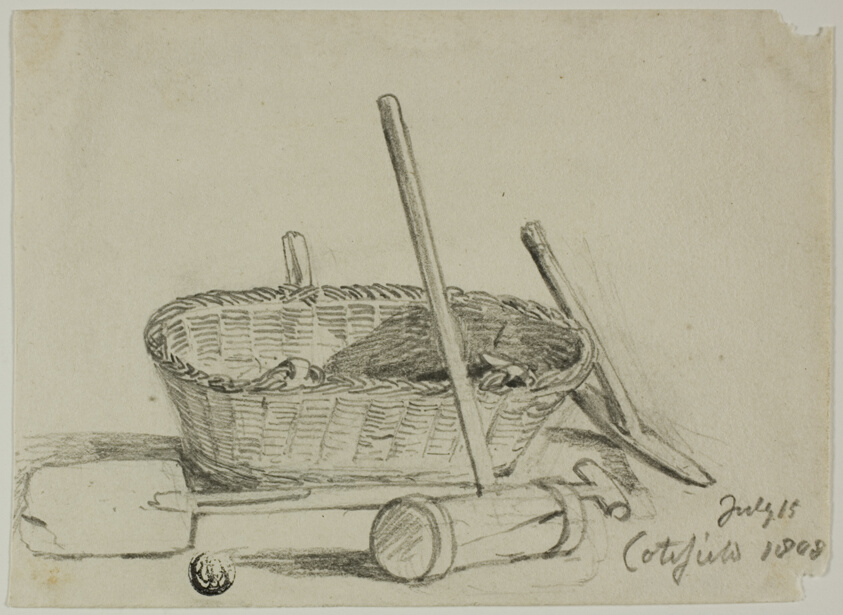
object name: Drawing and Watercolor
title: Wicker Basket, Mallet, Shovel, Pick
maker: Joshua Cristall (English, c. 1767-1847)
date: 1808/47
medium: Black chalk, on cream wove paper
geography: England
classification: chalk; drawings (visual works); prints and drawing